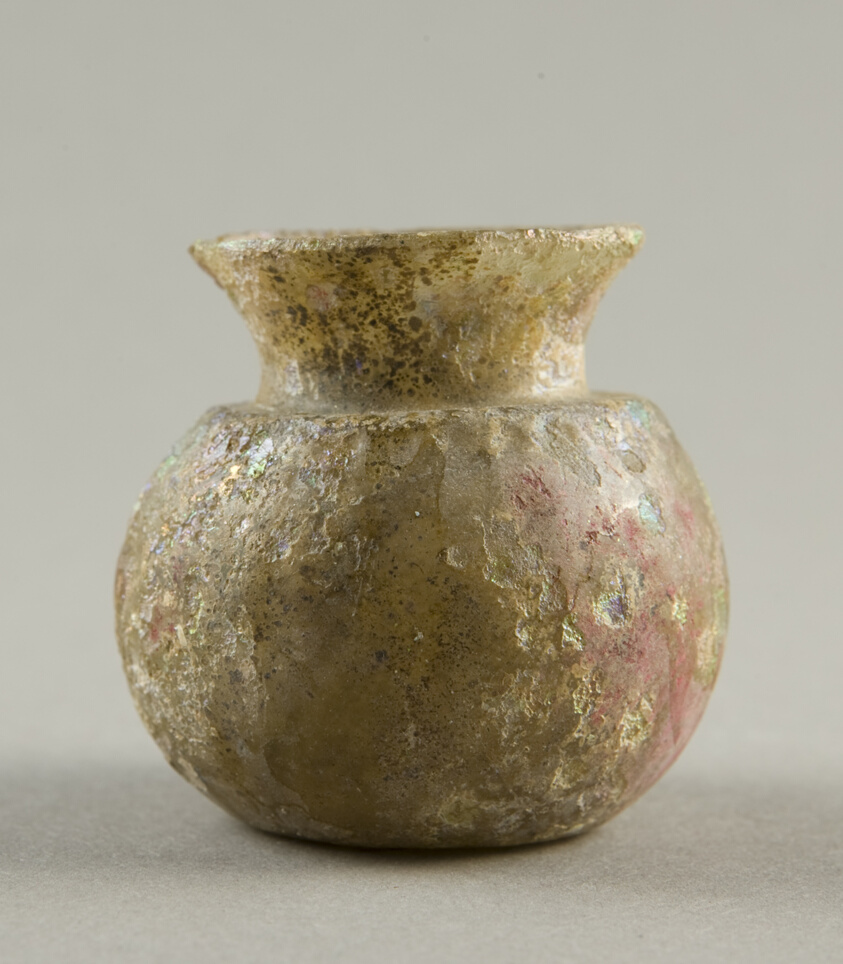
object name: Vessel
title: Jar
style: ancient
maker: Roman or Byzantine; Eastern Mediterranean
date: 2nd-6th century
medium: Glass, blown technique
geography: Mediterranean Region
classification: vessel; glass; ancient art